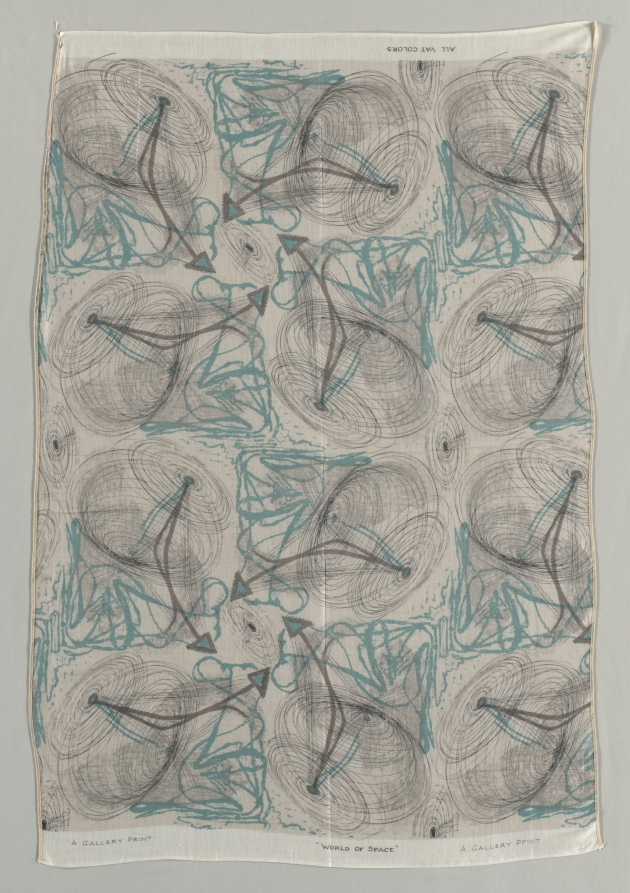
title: World of Space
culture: England, 20th century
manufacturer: Morton-Sundour & Co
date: 20th century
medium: plain weave linen?, printed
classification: Textile